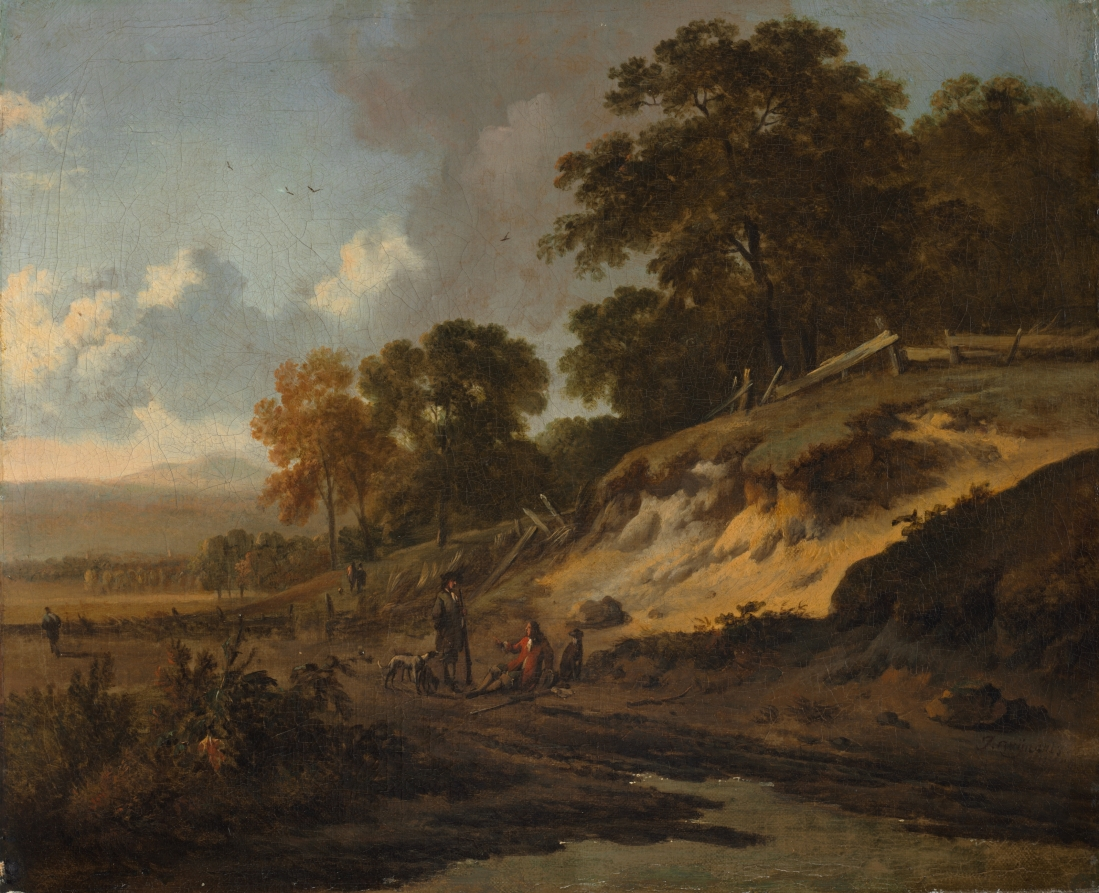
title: Landscape with Hunters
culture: Netherlands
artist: Jan Wijnants (Dutch, 1635–1684)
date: c. 1660–80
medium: oil on canvas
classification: Painting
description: Dune landscapes were a subject of great interest in seventeenth-century Netherlands, among the earliest subjects for independent landscape. They were the bread-and-butter speciality for Wijnants, whose far more unusual Amsterdam canal scene is also in the collection of the CMA.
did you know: To supplement his income as a painter, Jan Wijnants also owned an inn.